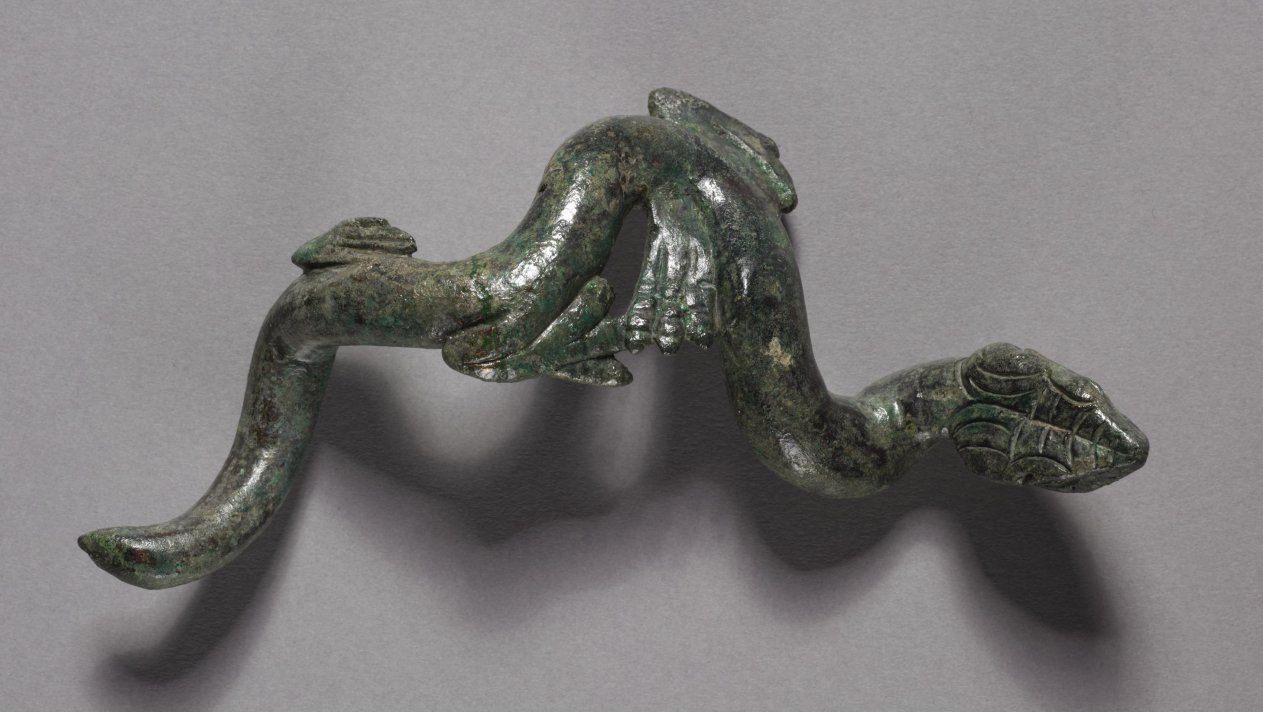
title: Detached Creature from the Cleveland Apollo: Apollo Sauroktonos (Lizard-Slayer) or Apollo the Python-Slayer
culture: Greece, Athens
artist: attributed to Praxiteles (Greek, Athenian, c. 400–330 BCE)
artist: or Follower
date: c. 350–200 BCE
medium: bronze, copper and stone inlay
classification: Sculpture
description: Both snakelike and lizardlike in appearance, the creature has a scaly head and four small feet. These are attached asymmetrically to its long and sinuous body, some with carefully delineated toes, others less detailed. The smallest foot falls behind a line bisecting the creature, where radiography shows a pin joining two separately cast sections. Although the bronze of the front and back halves is quite similar, the front half shows greater porosity (air bubbles). Perhaps the original back half was damaged during casting, necessitating a new or re-casting of that portion of the creature, with a smaller, relocated fourth leg.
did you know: Despite its small size, the creature was cast in two solid parts.